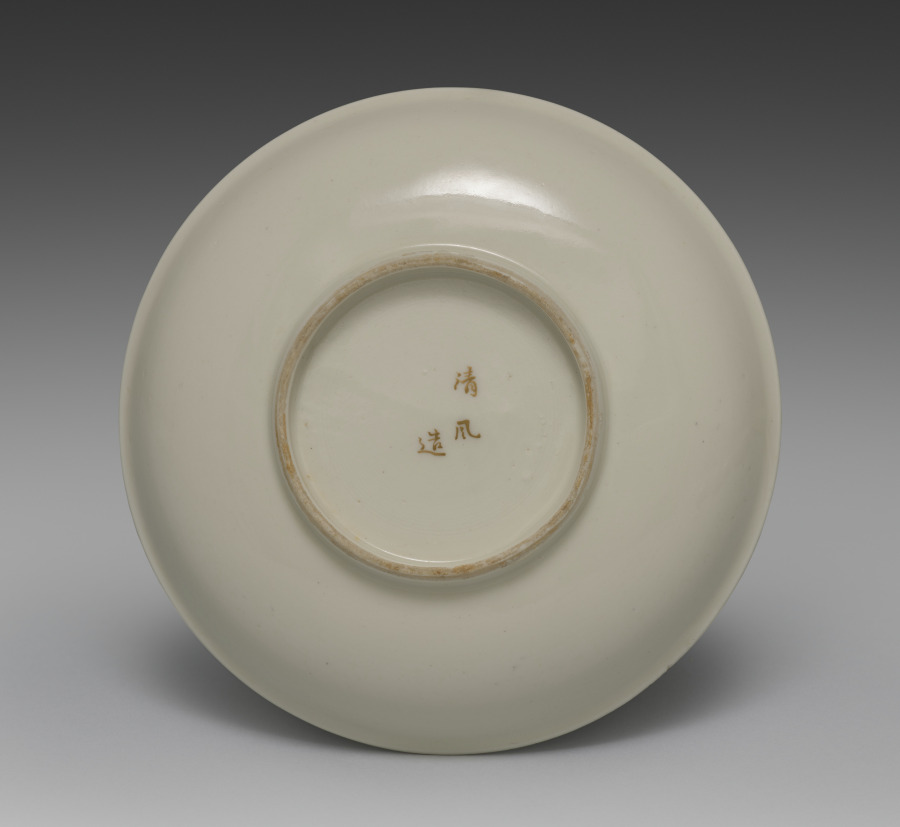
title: Medium-sized Dish from Dining Set with Plum Blossoms and Cracked-Ice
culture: Japan, Meiji period (1868–1912)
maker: Seifū Yohei II (Japanese, 1844–1878)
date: c. 1875–78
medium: Porcelain with molded designs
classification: Ceramic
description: Each item in this set has a delicate low-relief design of flowering plum branches over scattered, intersecting lines meant to resemble the cracked-ice surface of a frozen body of water and is signed on the base in gold pigment. While Yohei II produced many fine works in underglaze blue, like those produced by Kiyomizu Shichibei, he also made works in quite different styles later in his career, from the early 1870 s. In 1873, he was appointed purveyor to the Industrial Center of Kyoto Prefecture, a designation associated with Kyoto’s efforts to reach an international market through the port of Kobe; and from 1875 until his death, he was involved in national-level projects to present Japanese ceramics across the world. It was during this period that Yohei III was apprenticed to Yohei II, and it has been suggested that this set may in fact be an early example of Yohei III’s work, which he signed with his teacher’s name. Decorated with flowers resembling Japanese textile motifs, the set calls to mind the design of Yohei II’s pair of vases with plum blossoms in the Victoria and Albert Museum. Here, the elaborate trees created for a formal public exhibition setting have been translated into the approachable blossoms of the genteel domestic environment. While the designs are consistent across the pieces, each raised flower petal and pistil and each incised line in the ice was done by hand, so the cups, bowls, and dishes are similar yet unique. The bottoms of two boxes once identified the set’s owner, but the information has been deliberately obscured with black ink. However, inscriptions still visible appear to indicate two occasions, once at the end of July 1886 , and once again in June 1916 , when parts of the set were requested from Hokura in Niigata Prefecture. The location corresponds to a neighborhood in the present-day city of Jōetsu. The surname Tsuji 辻 also appears on a paper tag affixed to one of the box cloths. Future research may possibly reveal more about their provenance. A vase by Yohei III in a private collection combines the formal grandeur of the Yohei II vases in the Victoria and Albert Museum with the gentler design of this dining set, placing flowering plum trees against soft, scalloped-edge clouds resembling those in golden screens.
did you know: The dining wares have a creamy white coloration that the four boxes containing them identify as Korean in style.